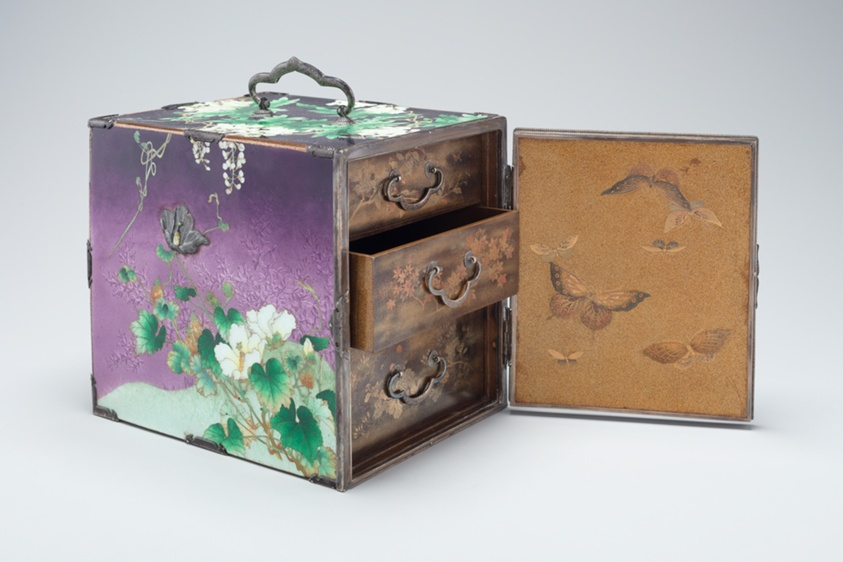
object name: Decorative Arts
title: Kodansu Small Chest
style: Japanese (culture or style)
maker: Japanese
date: early 20th century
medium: Enamel on silver, lacquer, and engraved silver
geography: Japan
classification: lacquerware; asian art; decorative arts